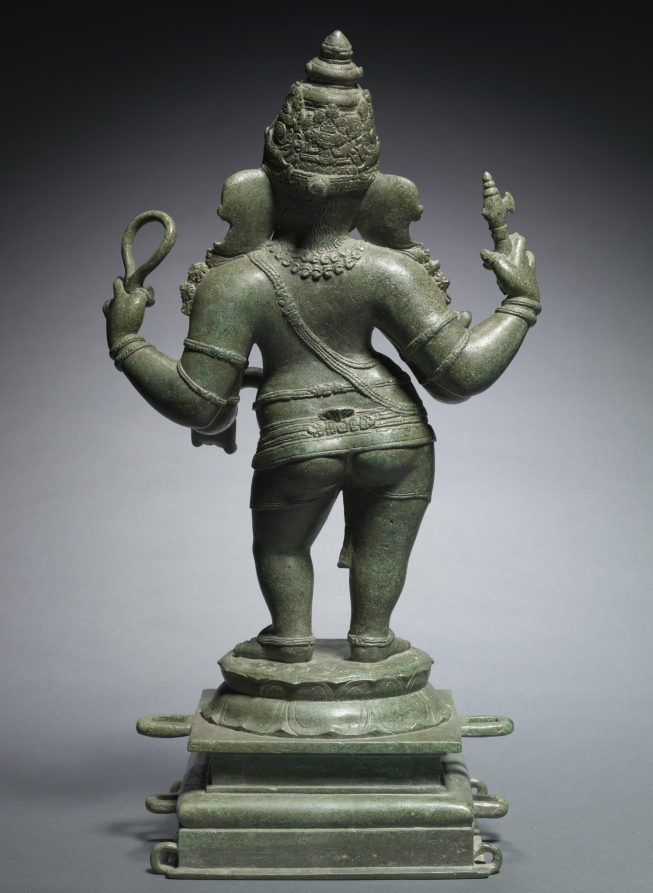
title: Ganesha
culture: South India, Medieval period, Chola dynasty(10th-13th century)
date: c. 1070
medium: bronze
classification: Sculpture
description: Ganesha, the god of wealth and abundance, is an auspicious and revered Hindu deity. He removes obstacles and protects his worshipers. Numerous myths explain how Ganesha became an elephant-man composite, but the most popular version relates the story of how he was decapitated by his enraged father, Shiva, and restored to life through the intervention of his mother, Parvati. Shiva agreed to revive him with the head of the first creature encountered: an elephant. Ganesha's strength—his profound spiritual wisdom—contrasts with his weakness for sweets, as indicated by his pudginess and the sweet modaka he carries. In Ganesha, opposing forces exist in perfect harmony.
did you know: Ganesha pulls his own broken tusk in one hand, which he used as a pen to write the epic Mahabharata.